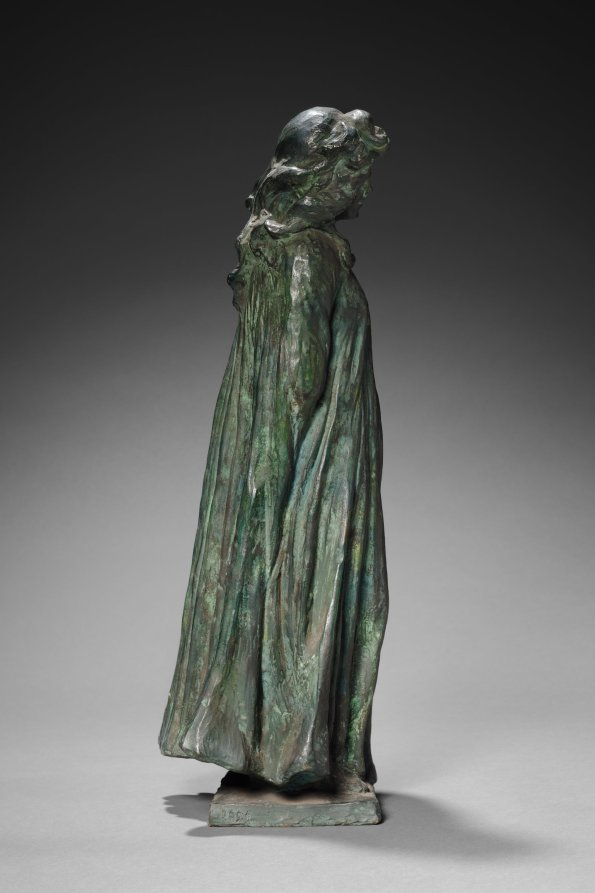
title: Loïe Fuller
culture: France, 19th-20th century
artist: Pierre Roche (French, 1855–1922)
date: c. 1900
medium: bronze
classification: Sculpture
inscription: Inscribed on the face of the base: "Loïe Fuller" and at the right, signature of the artist